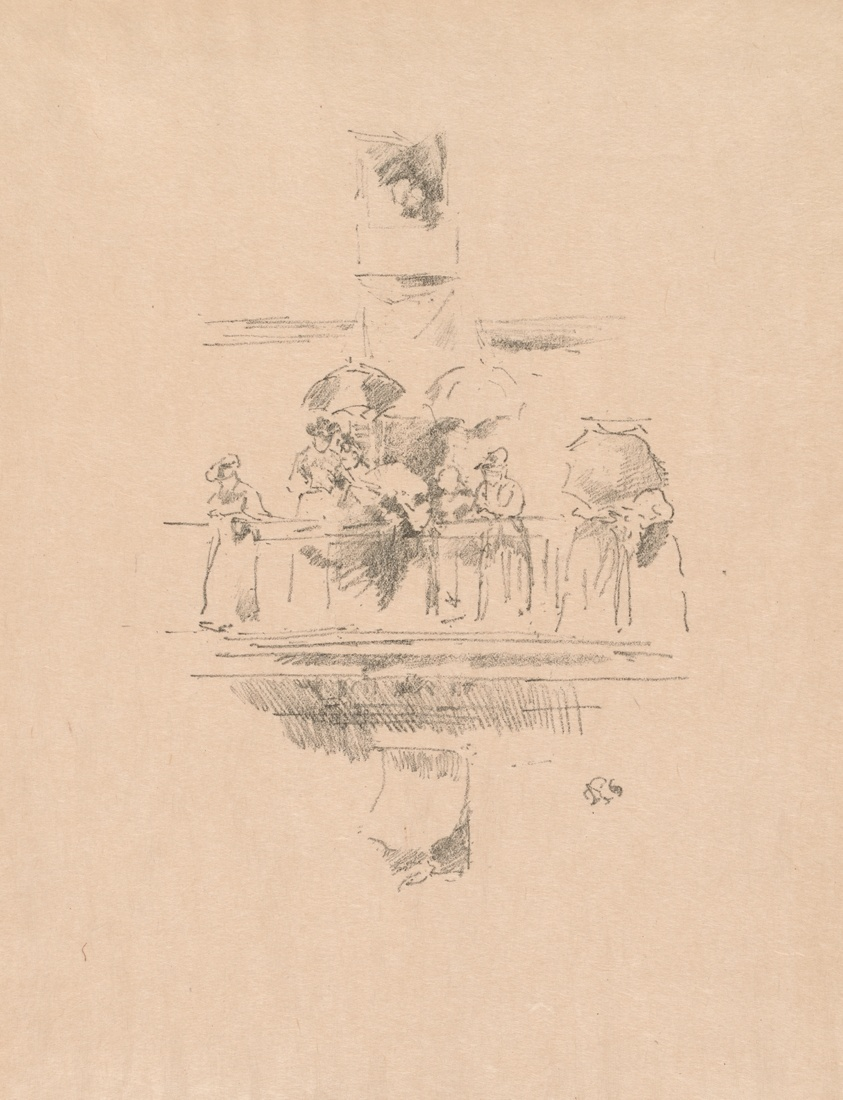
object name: Print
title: The Little Balcony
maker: James McNeill Whistler (American, 1834-1903)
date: 1894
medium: Transfer lithograph in black on cream Japanese paper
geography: United States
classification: transfer lithograph; lithograph; print; prints and drawing; paper